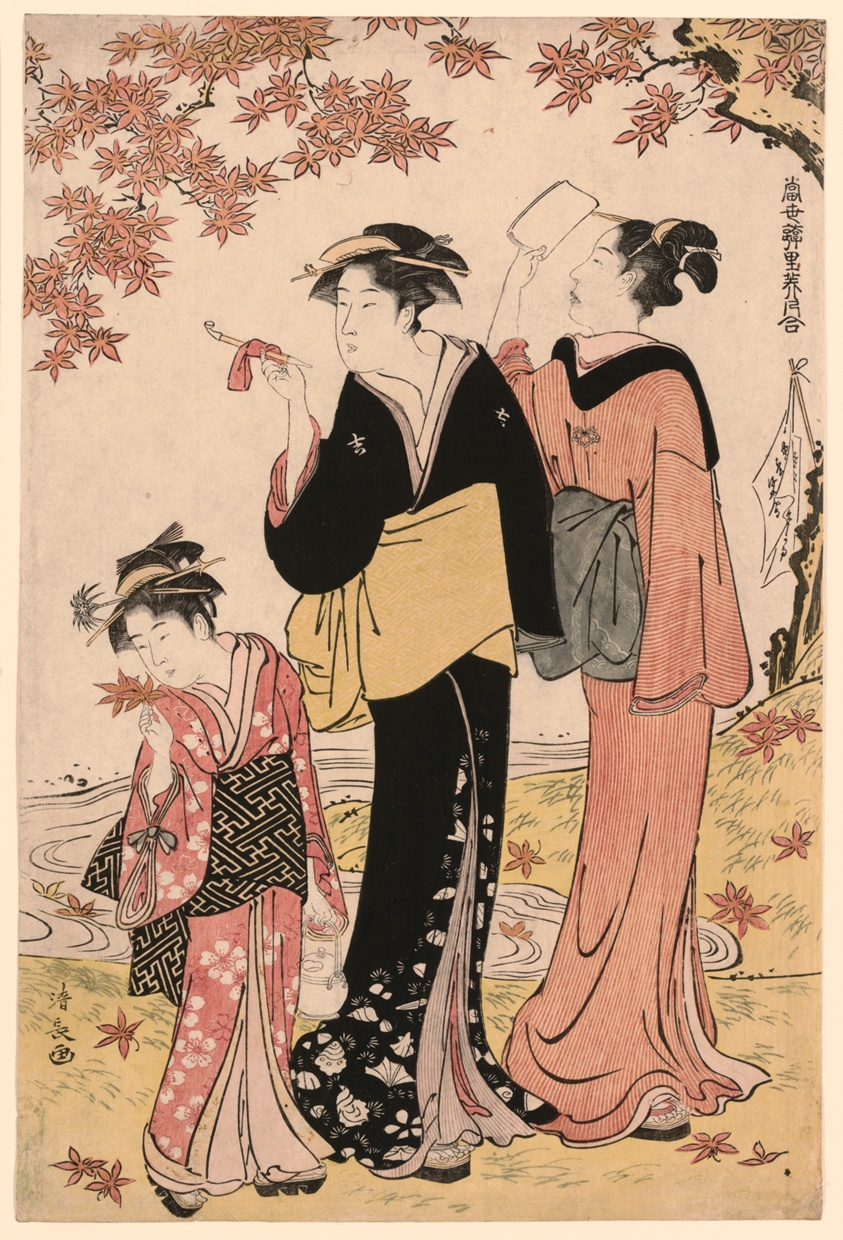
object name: Print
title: Beauties Under a Maple Tree, from the series "A Collection of Contemporary Beauties of the Pleasure Quarters (Tosei yuri bijin awase)"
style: Japanese (culture or style)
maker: Torii Kiyonaga (Japanese, 1752-1815)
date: c. 1784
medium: Color woodblock print; right sheet of oban diptych (left sheet: 1925.2653)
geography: Japan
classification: woodblock print; print; asian art